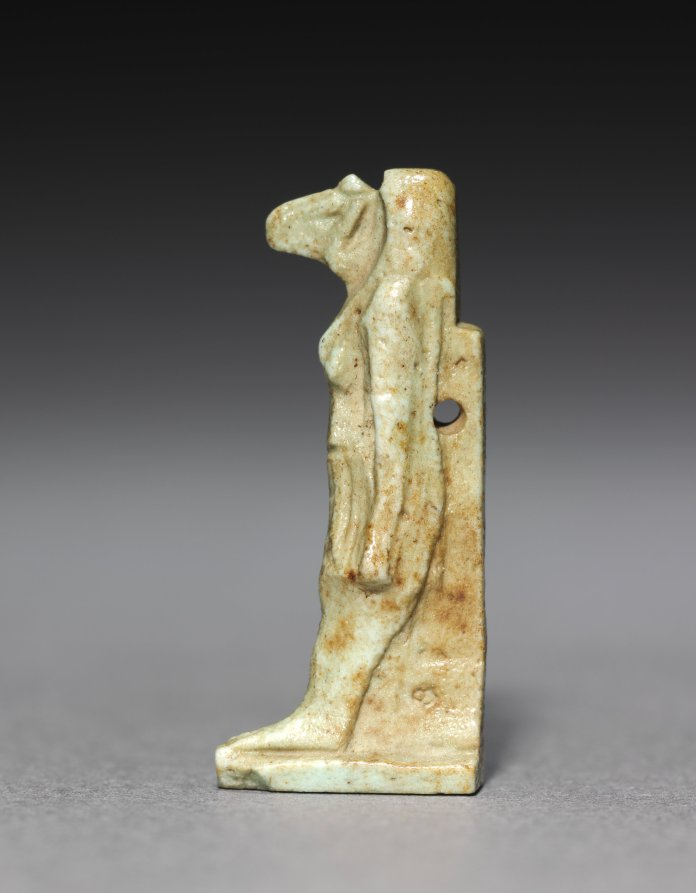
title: Amulet of Thoth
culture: Egypt, Late period (715–332 BCE), Dynasty 30–Greco-Roman period (332 BCE–395 CE), Ptolemaic dynasty (305–30 BCE)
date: 305–30 BCE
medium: gray green faience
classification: Amulets